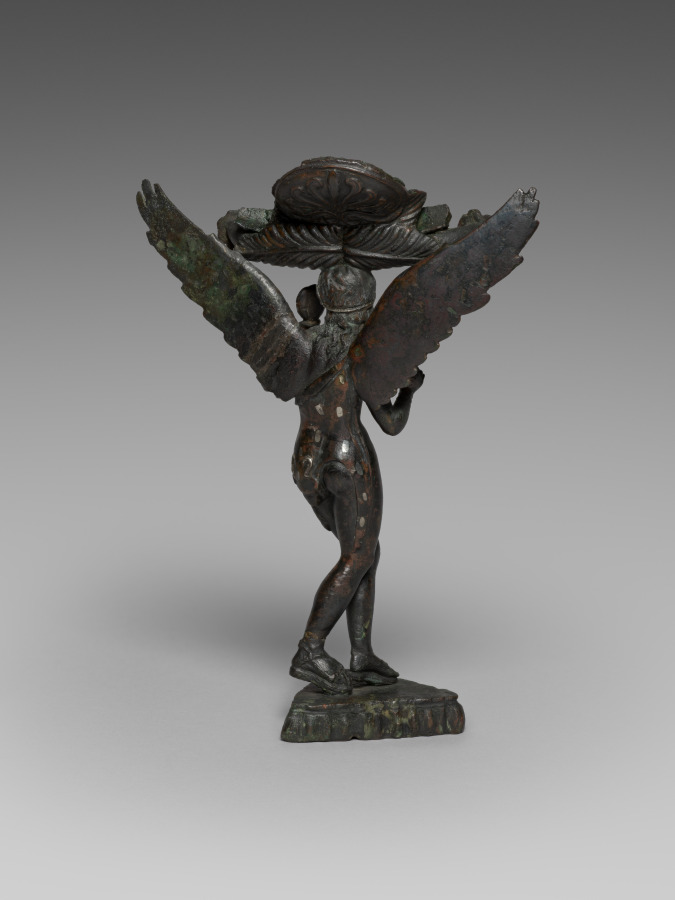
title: Patera Support: Lasa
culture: Etruscan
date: 300–175 BCE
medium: bronze with silver inlays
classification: Sculpture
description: Standing on a triangular base, this winged female figure twists her body while admiring herself in the small mirror held in her left hand. Nearly nude, she wears sandals as well as a leopard or panther skin and jewelry inlaid with silver. Above her head and wings, a small portion of a patera, or shallow offering dish, survives. Inscriptions identify similar winged female figures elsewhere in Etruscan art as Lasas, often together with Turan (an Etruscan goddess analogous to the Greek Aphrodite).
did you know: This elaborate figure served as a handle or support for a patera, a shallow dish.